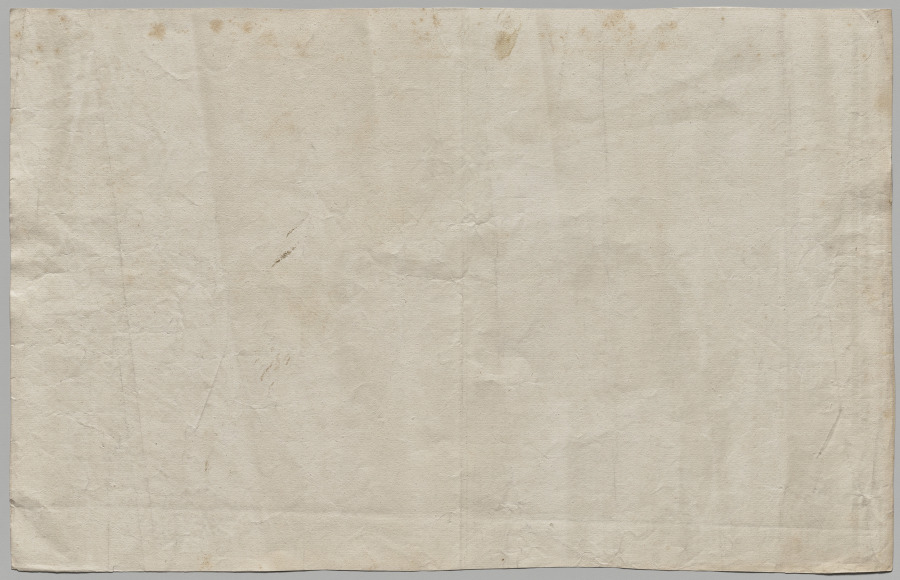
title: Nuova pianta di Roma data in luce da Giambattista Nolli l’anno MDCCXLVII, known as La Pianta Grande di Roma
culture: Italy, 18th century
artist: Giovanni Battista Nolli (Italian, 1701–1756)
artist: Carlo Nolli (Italian, 1690–1790)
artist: Rocco Pozzi (Italian, 1701–1774)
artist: Pietro Campana de Soriano (Italian, 1725–c. 1779)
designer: Stefano Pozzi (Italian, 1699–1768)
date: 1748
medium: etching and engraving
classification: Print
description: The monumental Pianta Grande di Roma, or Large Plan of Rome, which measures about 5 x 7 feet when its twelve plates are assembled, is a landmark in both cartography and printmaking. The map is considered the first scientific rendering of Rome, establishing new standards of accuracy and thoroughness when it was published in 1748. Devised by the Lombard architect and surveyor Giovanni Battista Nolli (Italian, 1701-56), the creation of the map required over ten years of surveying the city carried out by Nolli and a team of assistants with the help of new measuring devices. In Nolli’s “ichnographic” (also called “ground”) plan, architectural features and the urban infrastructure are reduced to a single horizontal slice, a minutely detailed footprint that conveys dimensions, proportions, and orientations to scale with the utmost clarity.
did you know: To make this map, Pope Clement XII granted the mapmaker permission to measure courtyards and other interior, inaccessible spaces in monastic communities, even those in nuns’ convents, which was controversial at the time.